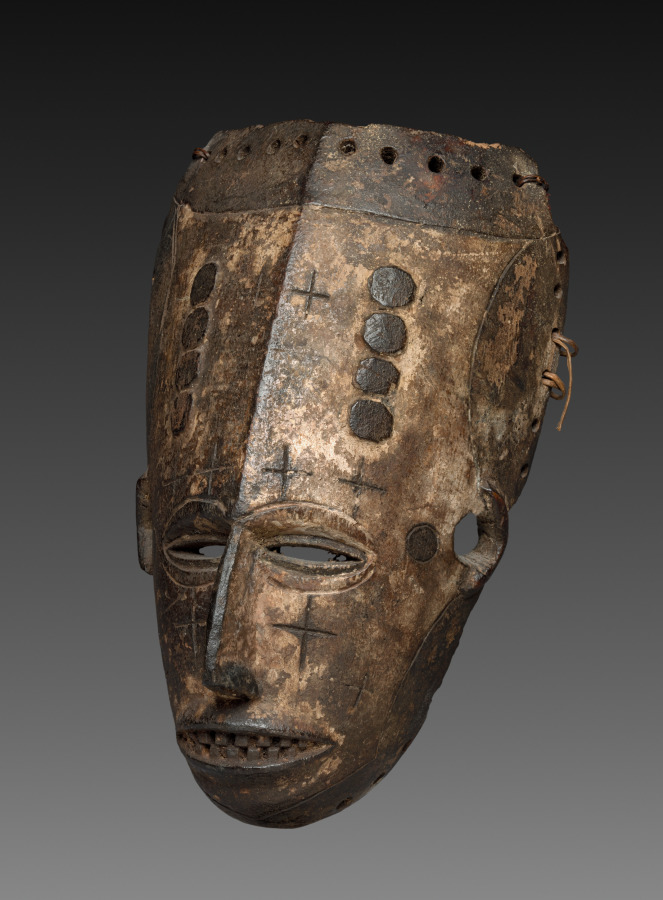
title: Face Mask (Agboho mmuo)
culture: Africa, West Africa, Nigeria, Igbo-style maker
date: possibly early 1900s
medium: Wood, pigment, plant fiber, and cotton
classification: Mask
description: This small face mask would have been complemented by a separate, elaborate superstructure covered with cotton cloth. Though always worn by a man, the image glorifies youthful female beauty. Derived from chalky clay, the white coloration of the face refers to ancestral spirits whose powers the mask evokes. The masks dance in festivals that generally celebrate the dead but also appear at funerals to escort the deceased to the land of the ancestors.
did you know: Though always worn by a man, the imagery of this mask celebrates youthful female beauty.